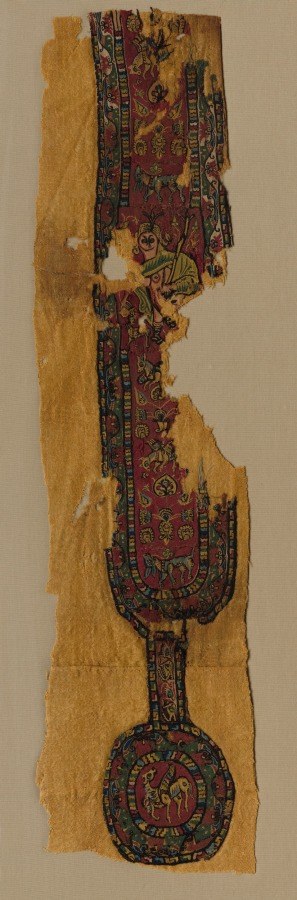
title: Clavi (Decorative Band)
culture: Egypt, Umayyad period (661–750) or Abbasid period (750–1258)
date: 700s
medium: wool; plain weave with slit-tapestry weave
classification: Textile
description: Figures and winged animals from ancient Greece and Rome remained popular during the early Islamic period of the Umayyad and Abbasid dynasties. The naked figure could represent Dionysus, the Greek god of wine; he holds his thyrsus, a staff decorated with ivy leaves and pinecones, while pouring liquid from a small jug for the panther. These colorful designs probably adorned the sleeve and front or back of a tunic, a garment worn directly on the body for over 1,000 years, from Roman antiquity to the Middle Ages. Popular decorations were regularly reused and sewn onto new tunics, as can be seen on this winter garment made of wool.